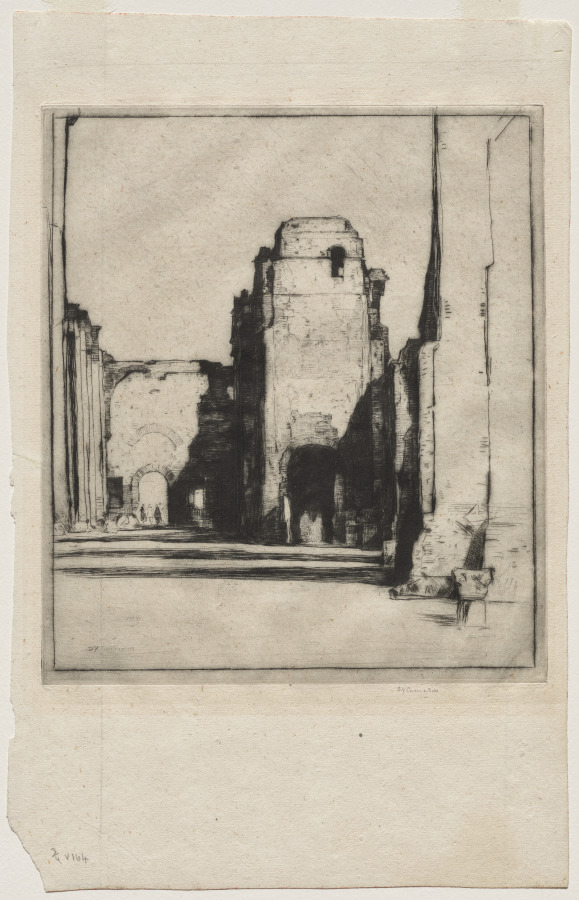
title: Tepidarium, Baths of Caracella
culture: England, 19th-20th century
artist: David Young Cameron (British, 1865–1945)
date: 1925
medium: etching and drypoint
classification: Print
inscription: signed in plate: DY Cameron (l.l.) and in graphite below platemark: DY Cameron; inscribed in graphite in lower left corner of sheet: 3/4 V164